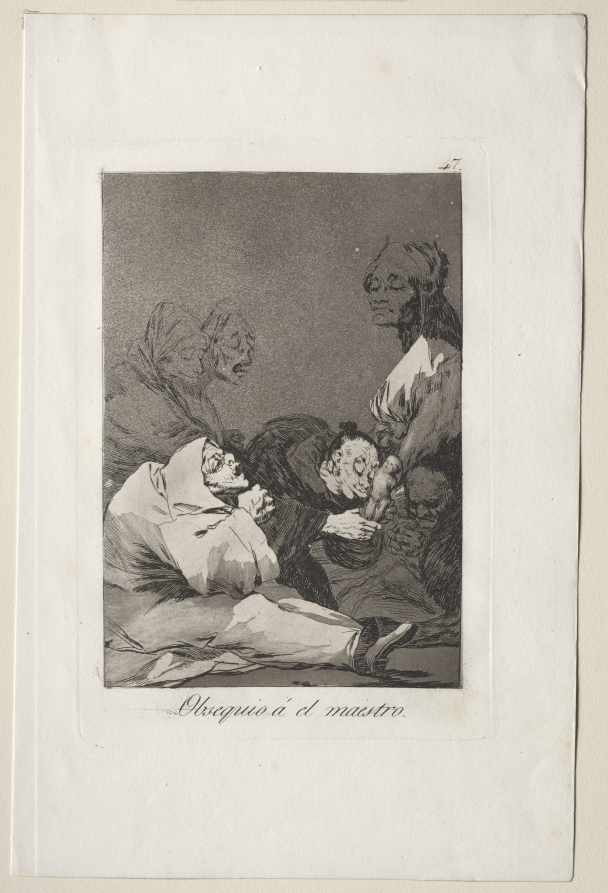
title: A Gift for the Master, Plate 47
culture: Spain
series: Los Caprichos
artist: Francisco de Goya (Spanish, 1746–1828)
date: 1799, printed c. 1855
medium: etching and aquatint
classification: Print